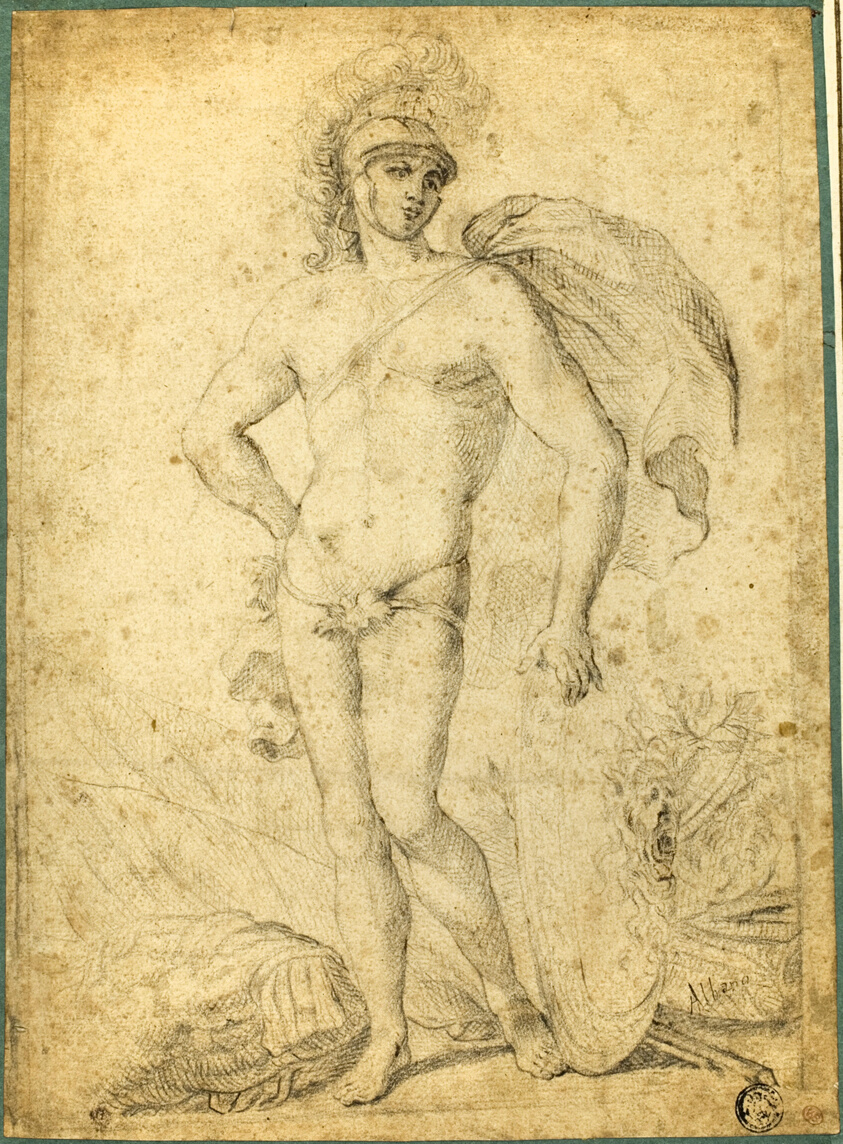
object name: Drawing and Watercolor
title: Standing Nude Warrior, possibly Mars, with Shield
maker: after Francesco Albani; Italian, 1578-1660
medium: Black chalk, with touches of pen and brown ink, on tan laid paper, tipped onto ivory wove paper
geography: Italy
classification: chalk; drawings (visual works); prints and drawing